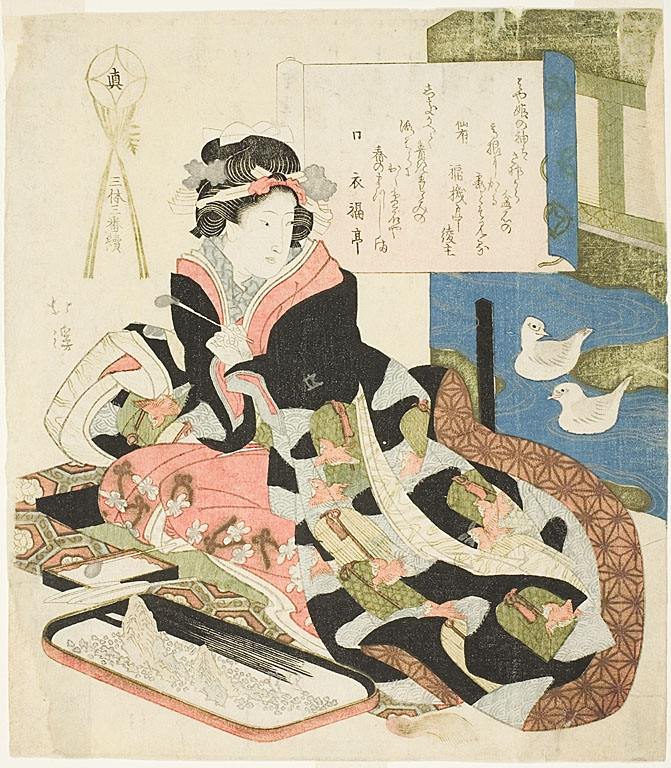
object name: Print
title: Woman Staring at Ducks, or The Righteous Body (Shin), from the series "Three Works of Three Aesthetics (San tai san ban shoku)"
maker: Totoya Hokkei (Japanese, 1780-1850)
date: about 1830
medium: Color woodblock print; surimono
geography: Japan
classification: woodblock print; print; asian art